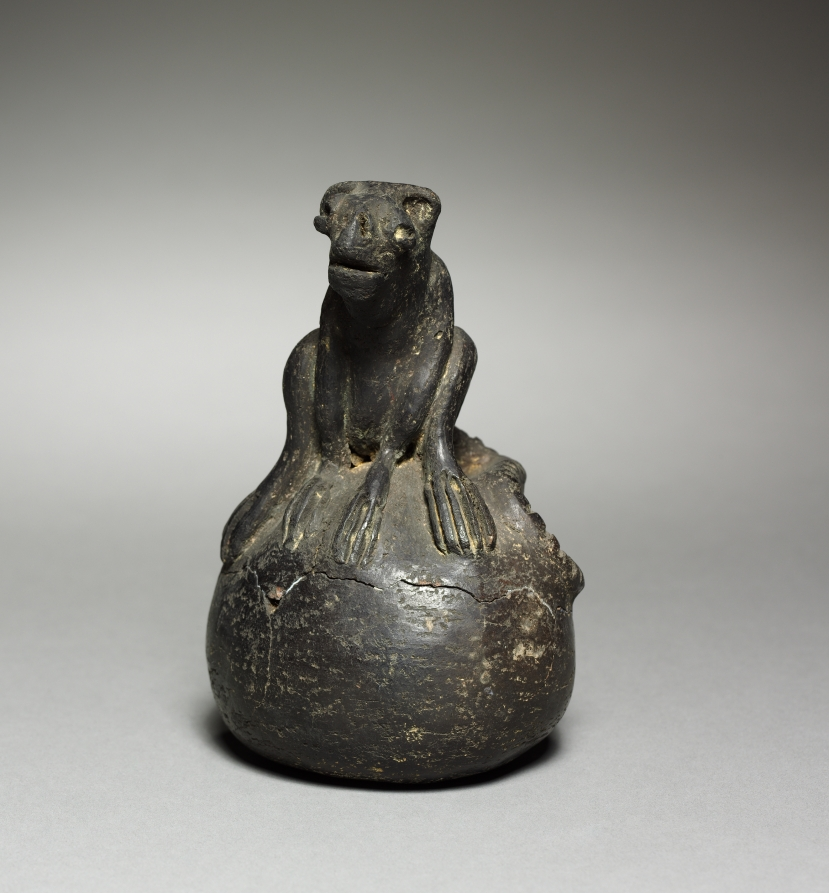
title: Figurine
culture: Colombia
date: before 1921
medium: pottery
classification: Ceramic